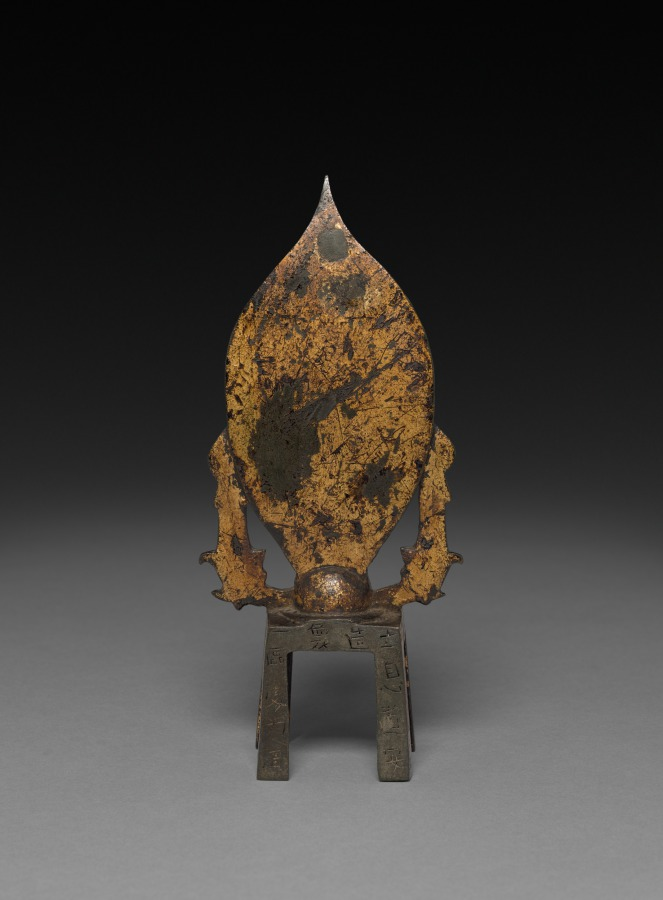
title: Sakyamuni with Two Attendants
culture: China, Sui dynasty (581-618)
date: 600s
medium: gilt bronze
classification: Metalwork